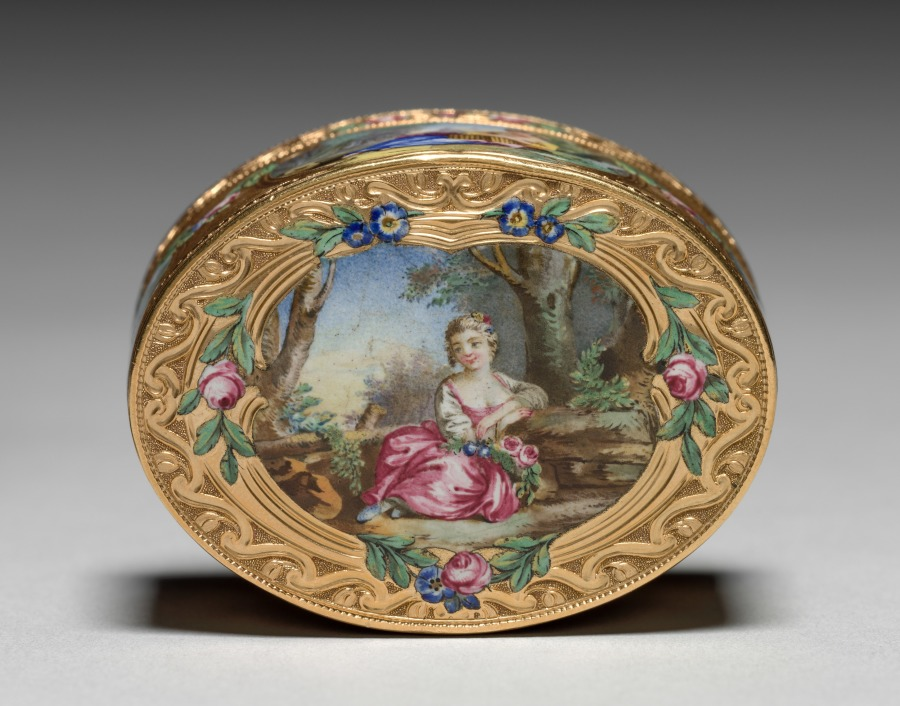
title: Snuff Box (Tabatière)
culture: France, 18th century (style of Louis XV)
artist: Francois Guillaume Tiron (French)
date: 1761–62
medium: gold and enamel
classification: Miscellaneous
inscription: [Maker's mark of Francois-Guillaume Tiron, master goldsmith in 1747, inside cover]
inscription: [Warden's mark, Paris, 1761-1762, inside cover]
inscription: [Charge mark of Eloi Brichard and Etienne Somfoye, Paris, 1756-1762, inside cover]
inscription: [Maker's mark of Francois-Guillaume Tiron, inside bottom]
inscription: [Warden's mark, 1761-1762, inside bottom]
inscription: [Charge mark of Brichard and Somfoye, inside bottom]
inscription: [Maker's mark of FG Tiron, left wall]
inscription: [Charge mark of Brichard and Somfoye, left wall]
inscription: [Warden's mark, Paris, 1761-1762, left wall]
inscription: [Discharge mark of J.J. Prevost, Paris, 1762-1768, bezel at right]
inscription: [Engraved number, maybe retailer's number]: "n. 13676"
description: The pastoral scenes that decorate this box are typical of the style of François Boucher, a celebrated painter of the period whose works were popularly reproduced on decorative arts. Snuff boxes, used practically as containers for powdered tobacco, were often decorated with miniature reproductions of notable works. The miniature on the cover is inspired by Boucher’s The Galant Pastor (Le Pasteur Gallant) (1738) and that on the bottom by The Amusement of the Shepherd Girl (L’Amusement de la Bergère) (1700s).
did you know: François Boucher was a favorite of the French royal court of Louis XV and named first painter of the king in 1765.